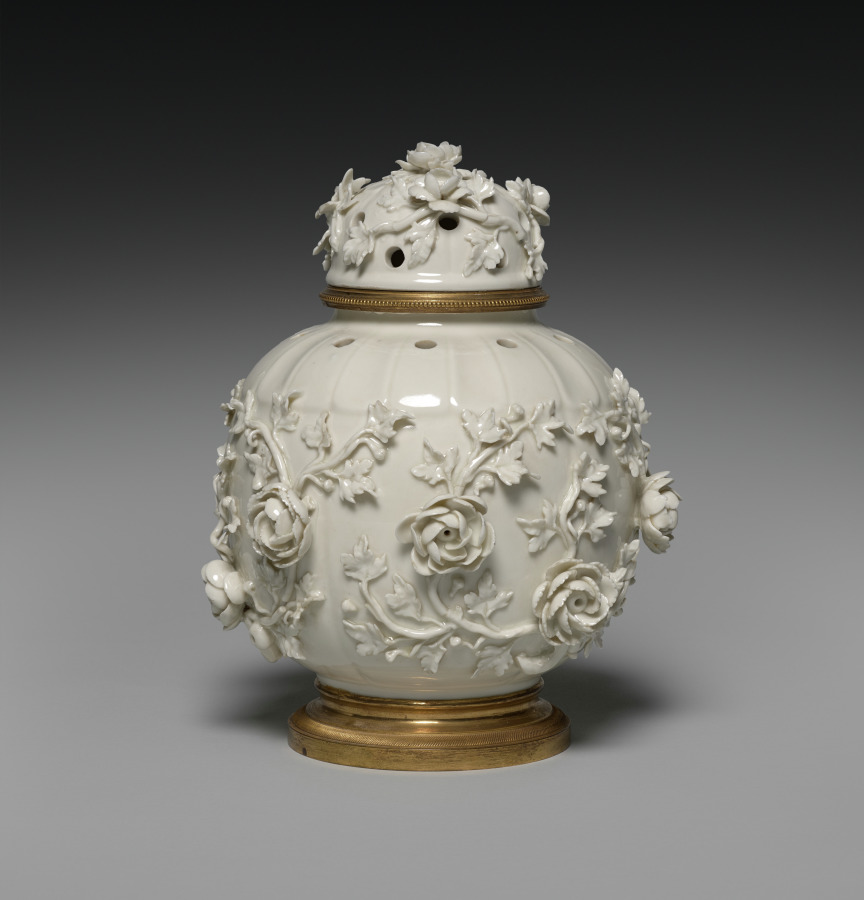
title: Potpourri Vase with Cover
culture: France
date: c. 1860–80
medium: blanc-de-chine porcelain; gilt bronze mount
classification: Ceramic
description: This vase was likely made by the celebrated Parisian ceramics firm of Edmé Samson (1810-91). To cater to the resurgence in taste for 18th-century designs, the Samson firm specialized in making reproductions of rare 18th-century European porcelains, especially those from firms that had already copied Chinese porcelains. In this case, this vase's design is taken from models produced by the St. Cloud factory in the 1750s after earlier Qing dynasty Chinese ceramics. However, the telltale sign that this vase is made by Samson and not St. Cloud is that the original would have been made from a soft-paste porcelain (fired at a lower temperature), while this example is made of hard-paste porcelain (fired at the highest temperature).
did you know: Potpourri vases always have holes in the top to let the scent of dried spices and flowers contained within freshen the air around them.